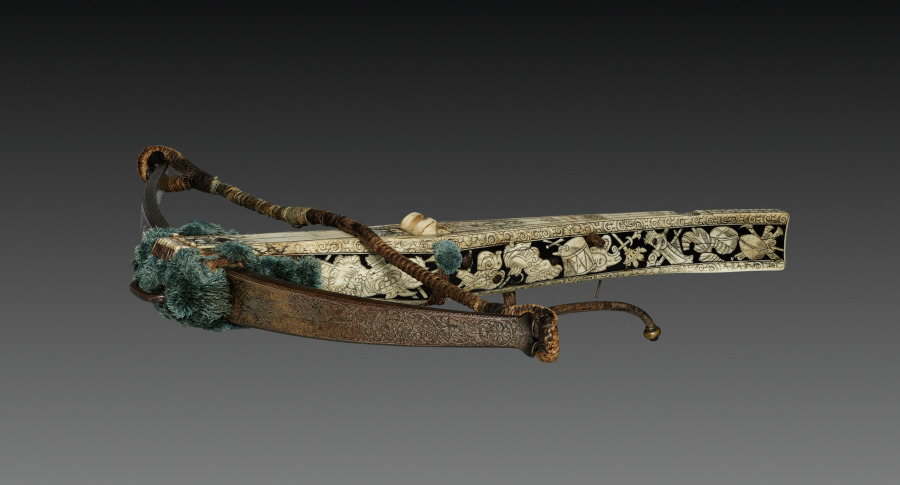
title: Crossbow of Elector Augustus I of Saxony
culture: Germany, Saxony, 16th century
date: c. 1553–73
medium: wood (walnut?), bone veneers, flax cord, steel (etched, traces of gilding). woolen pompoms, stock decorated wih inlaid trophies of arms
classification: Arms and Armor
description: This crossbow was a hunting weapon for Prince Elector Augustus I, a member of the ruling elite in the Holy Roman Empire. Augustus, powerful and wealthy, had even the most practical instruments ornately decorated, including this crossbow and its cranequin, or winding device.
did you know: Augustus was a marksman who took part in crossbow competitions. He had a large collection and often gave them to friends.